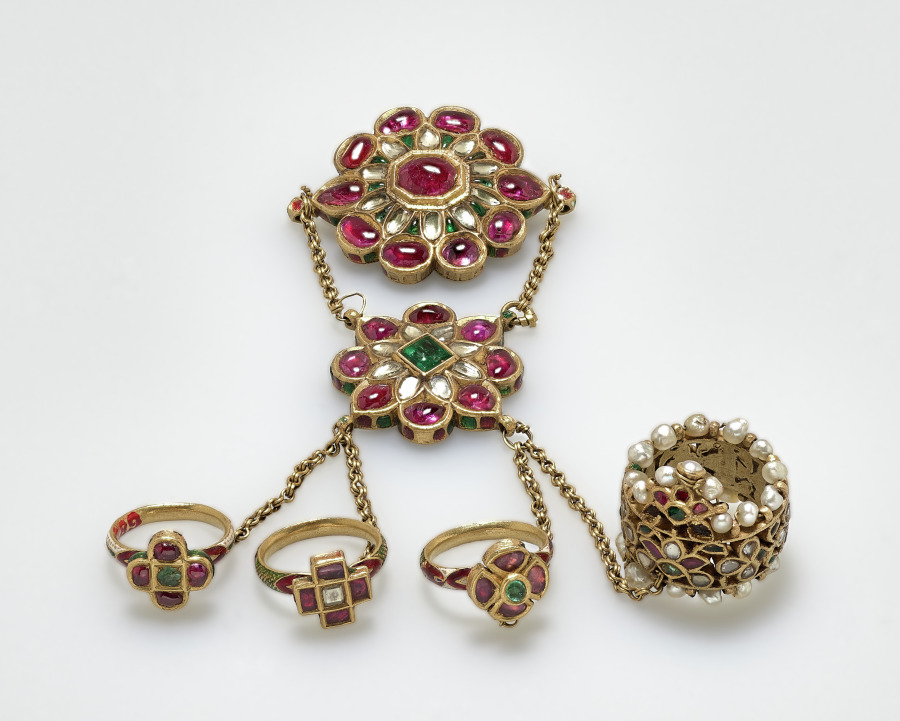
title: Set of Rings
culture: India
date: 1800s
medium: Gold with white, green, and red enamel; rubies, emeralds, clear quartz, and pearls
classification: Jewelry